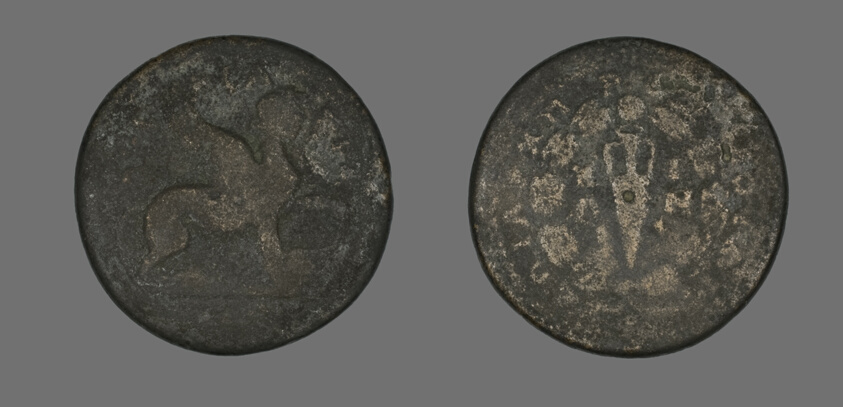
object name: Coin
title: Coin Depicting a Sphinx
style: roman (ancient, style or period)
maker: Roman; Chios, Ionia (now Turkey)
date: 138-192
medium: Bronze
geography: Roman Empire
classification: coin; ancient art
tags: sphinxes, vessels